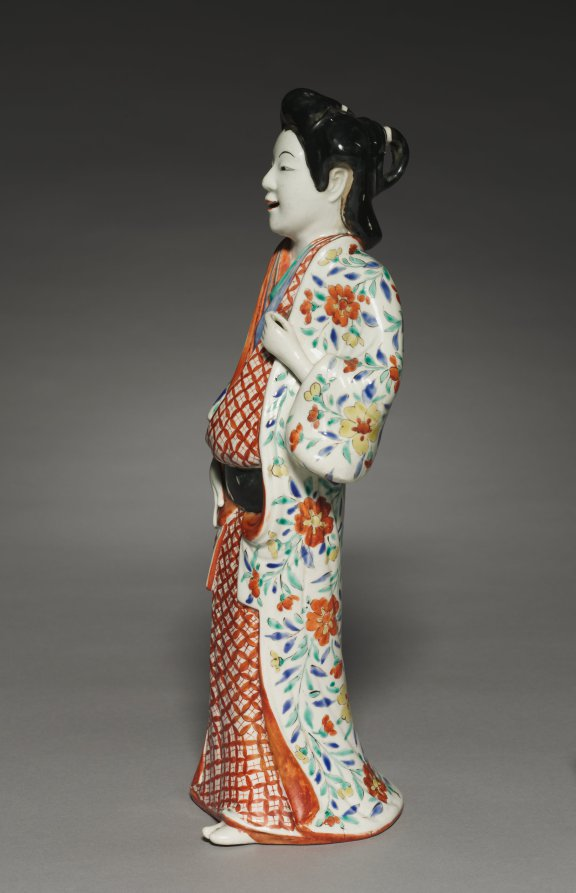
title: Standing Figure of a Beauty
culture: Japan, Edo period (1615–1868)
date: c. 1690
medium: Porcelain with overglaze color enamels (Hizen ware, Kakiemon type)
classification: Ceramic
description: Dressed in layered robes and a jacketlike garment called an uchikake with a lively floral design, figures such as this one may have derived from dolls formed in the likeness of courtesans. It was produced in Hizen Province (in present-day Saga Prefecture on the island of Kyushu) by the Sakaida family of ceramists, the head of which has gone by the first name Kakiemon for many generations. As a result, the studio’s historical works are known as Kakiemon ware. The studio is distinguished for being among the earliest in Japan to use multicolor overglaze enamel and for the milky white of its porcelain.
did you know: Look closely! One of this fashionable woman's feet is peeking out from under her layered kimono.